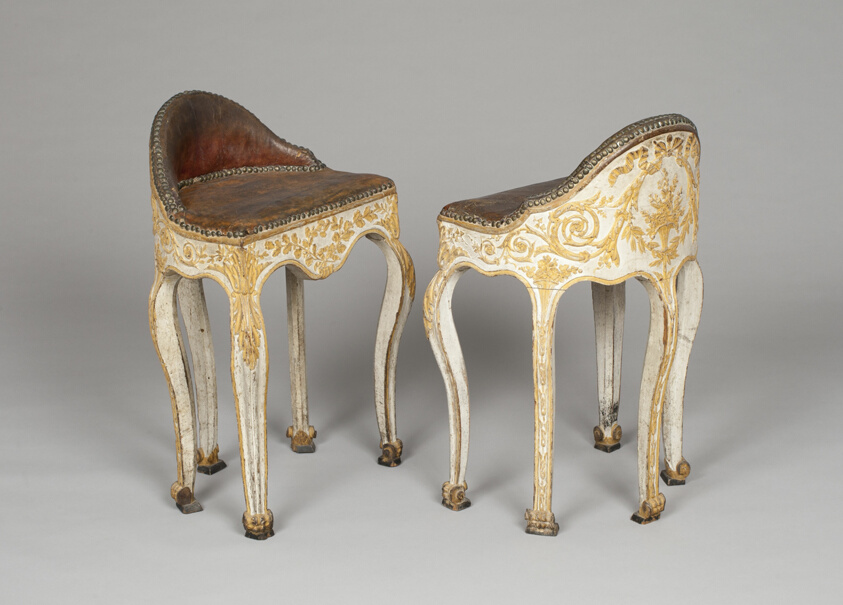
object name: Furniture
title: Pair of Musician's Chairs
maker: Possibly France, possibly Italy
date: c. 1770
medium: Wood, leather, and brass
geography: Northern Italy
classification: chair; seating; furniture; european decorative arts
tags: furniture